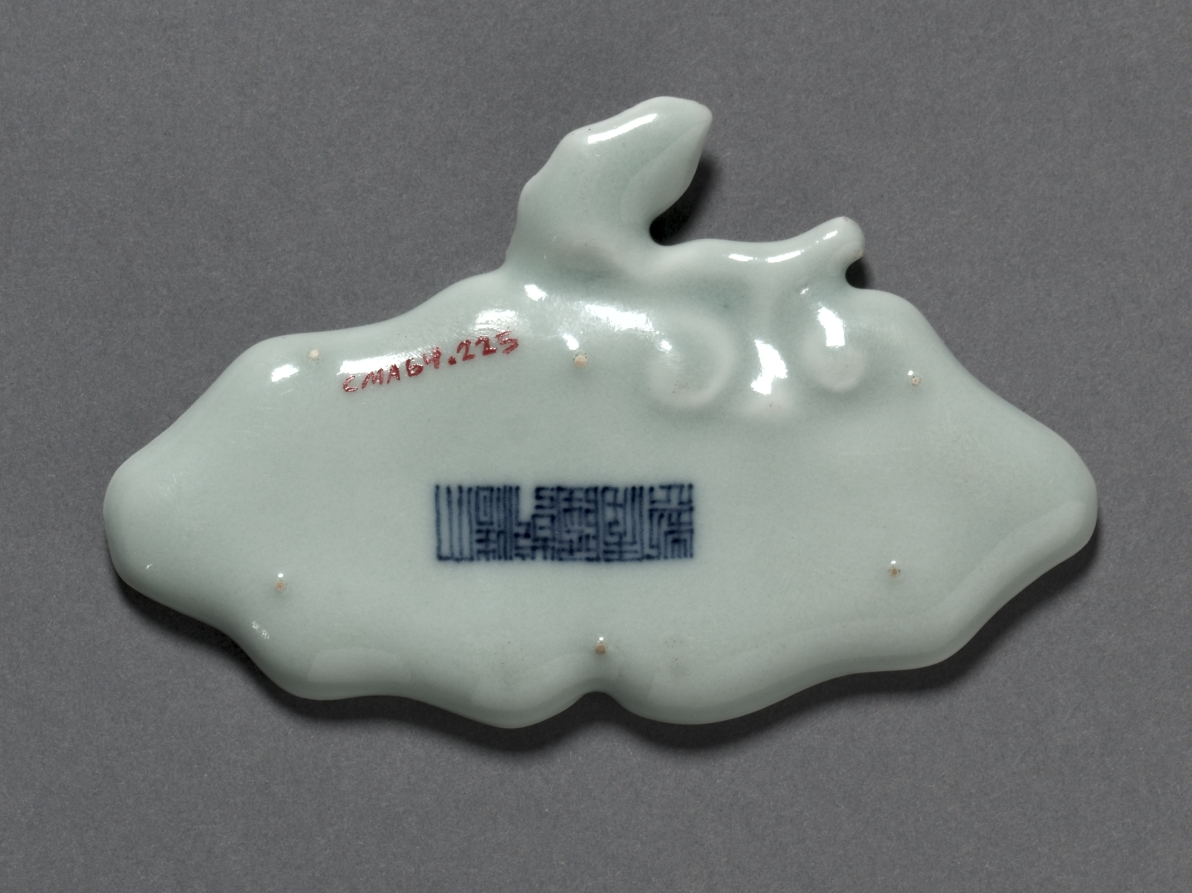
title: Brushwasher in Form of Lingzhi Fungus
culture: China, Jiangxi province, Jingdezhen kilns, Qing dynasty (1644-1911), Qianlong mark and reign (1736-95)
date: 1736–95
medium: porcelain with celadon glaze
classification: Ceramic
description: In China, access to political power was granted to those who passed the civil service examinations, a system that offered official service only at a high level of education. Chinese literati-officials, whose daily routine involved administrative work in an office, enjoyed precious objects on their writing desks that offered distraction and demonstrated good taste. By the Ming (1368–1644) and Qing (1644–1911) dynasties, these utensils of the literati studio became also collectibles and were treasured as artworks. Desk objects included paper weights, seals and seal paste boxes, brush rests like this porcelain one, wrist rests, brush holders, water droppers, ink cakes, miniature mountains, and albums, all ranging in material from jade, gilt bronze, lacquer, and wood to porcelain.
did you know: Lingzhi is a woody mushroom often used in traditional Chinese medicine and associated with immortality.